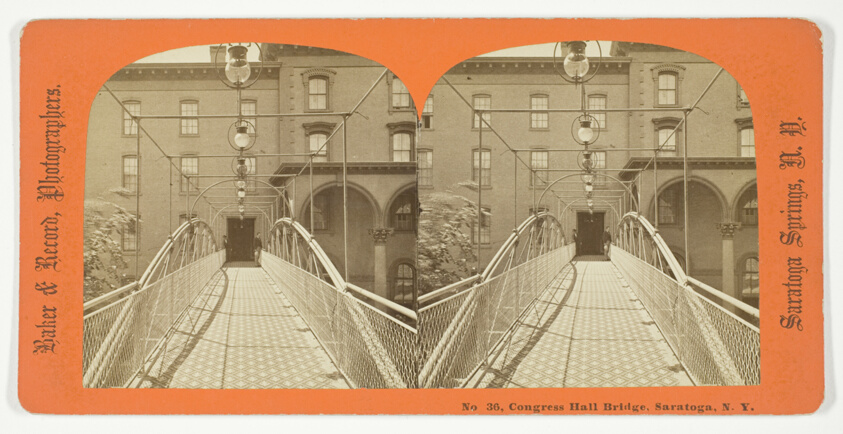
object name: Photograph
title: Group on Summit of the Mountainstereo, No. 8305 from the series "Mount Kearsarge Scenery, Andover, New Hampshire"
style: 19th century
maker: Anthony & Company; American, active 1848–1901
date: 1869/1901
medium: Albumen print,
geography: United States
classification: stereograph (albumen); albumen silver print; photographic process; photography; photograph